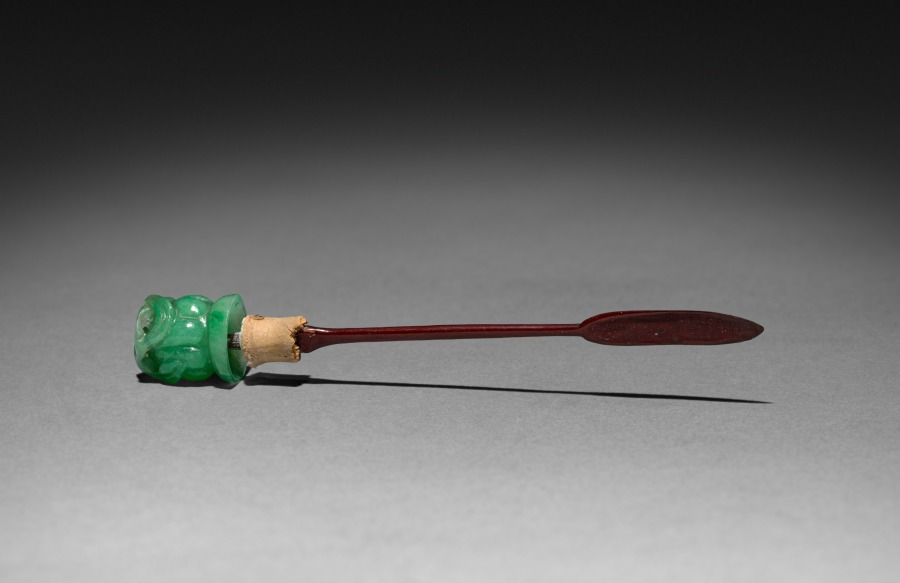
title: Snuff Bottle (stopper)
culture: China, Qing dynasty (1644-1911)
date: 1644–1911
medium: glass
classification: Glass